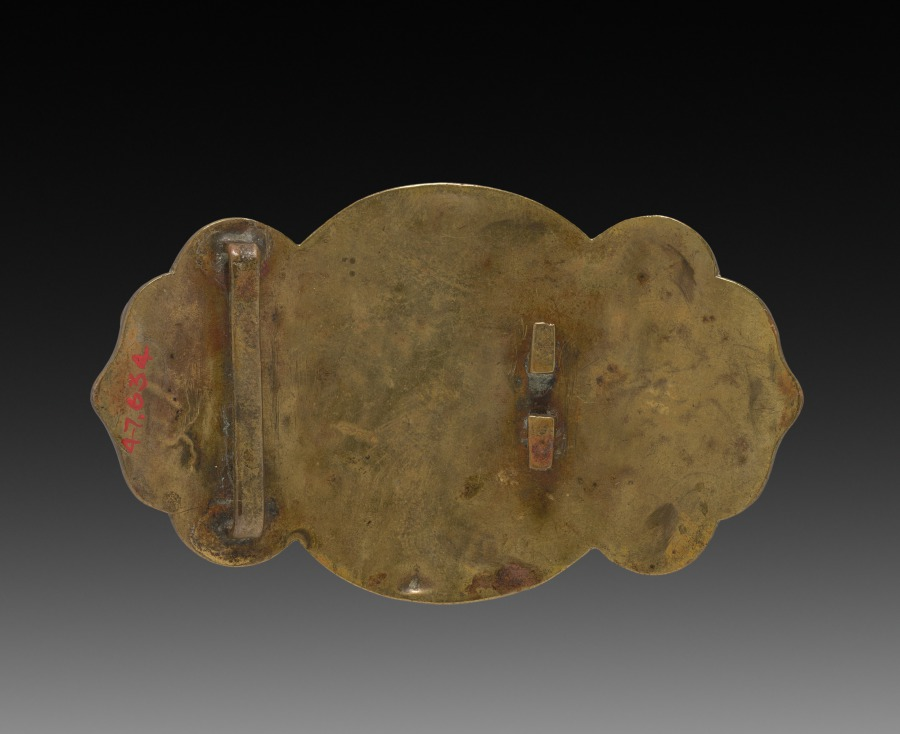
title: Buckle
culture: China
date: 1900s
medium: brass, engraved and set with white jade and rose quartz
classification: Jewelry